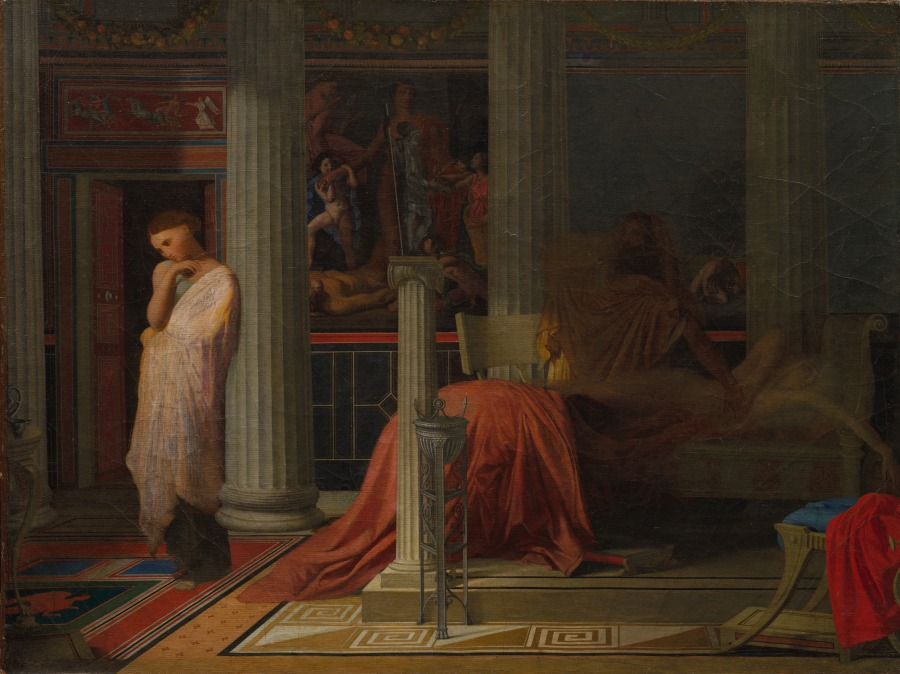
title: Antiochus and Stratonice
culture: France, 19th century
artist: Jean-Auguste-Dominique Ingres (French, 1780–1867)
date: c. 1838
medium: oil on linen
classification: Painting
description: Struck by a mysterious illness, Antiochus lies in bed near death. His grieving father, who has recently taken Stratonice as his wife, summons a doctor. Noticing that the sight of the young woman quickens Antiochus’s pulse and that passion causes his sickness, the doctor describes the youth’s predicament to his father, who selflessly offers Stratonice to his son. The subject, both a love story and an example of parental devotion, enjoyed considerable popularity well into the 1800s.